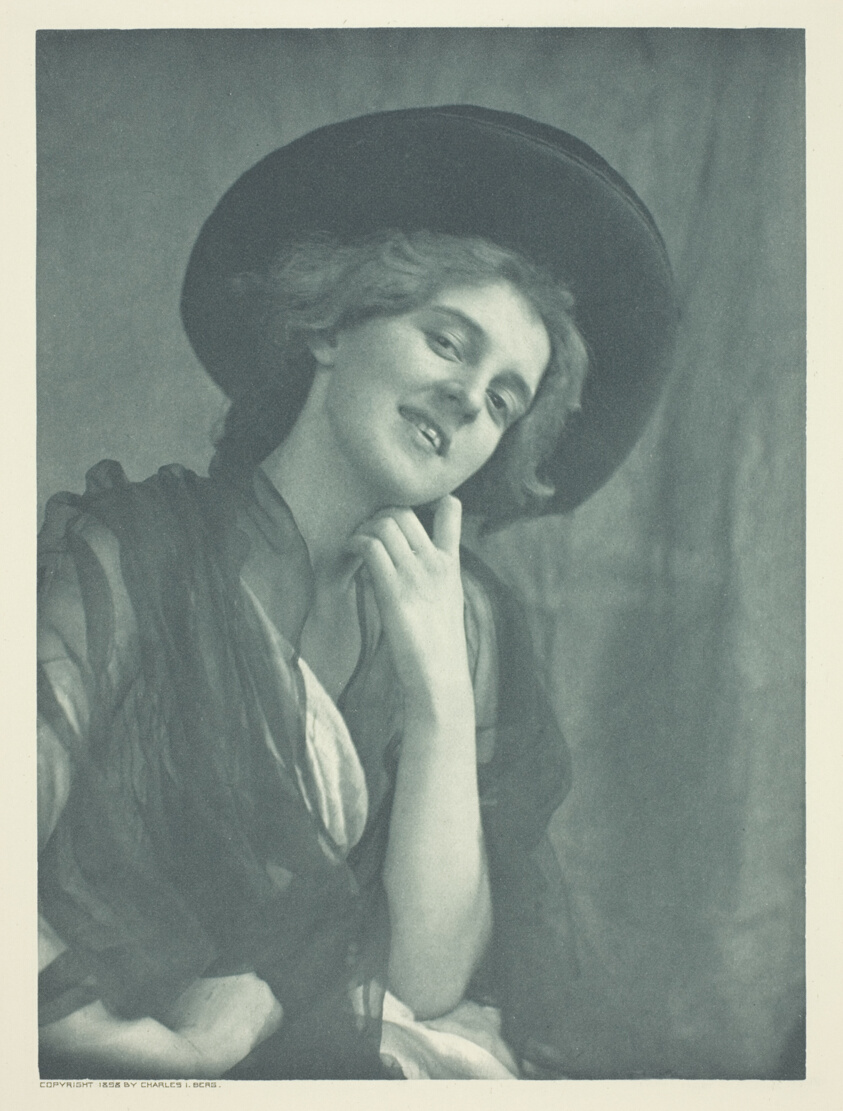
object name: Photograph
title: Coquette, No. 13 from the portfolio "American Pictorial Photography, Series II” (1901); edition 34/150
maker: Charles I. Berg (American, 1856–1926)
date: 1898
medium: Photogravure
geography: United States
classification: photogravure; photomechanical process; photography; photograph